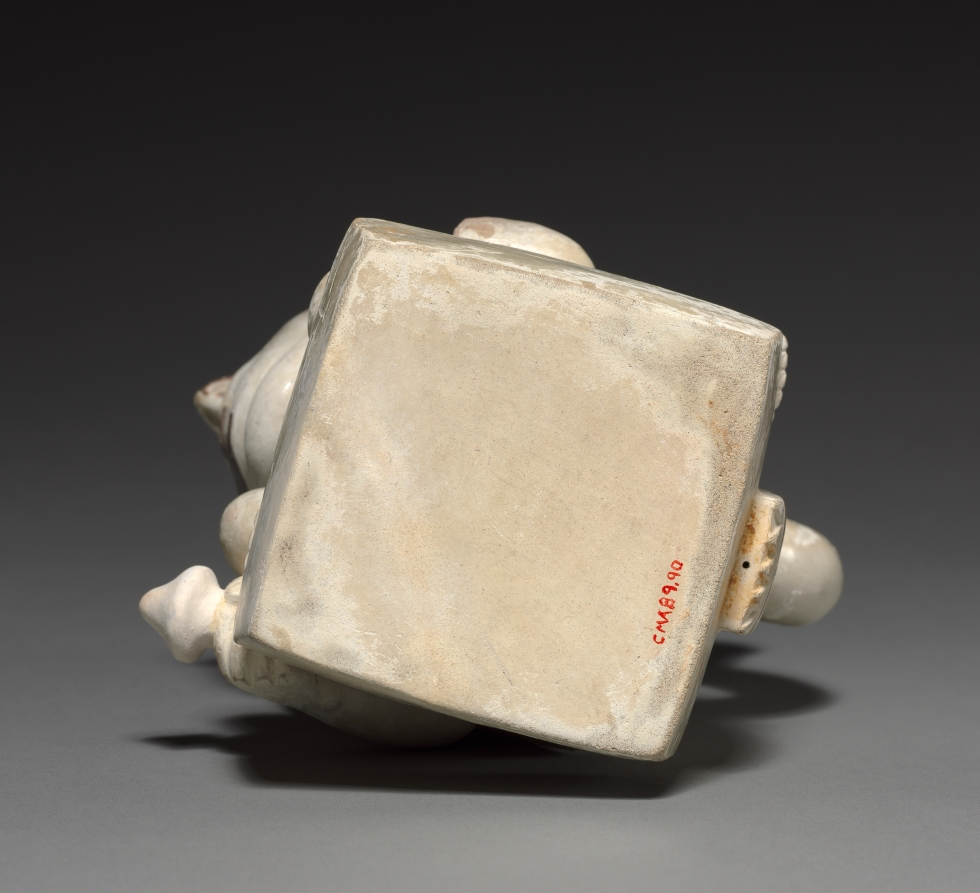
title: Warrior Vessel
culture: Peru, North Coast, Moche, Moche style (50-800)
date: c. 50–200 CE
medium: earthenware with colored slips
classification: Ceramic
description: This vessel's exquisite, crisp detail rewards careful viewing. The modeling of the feline pelt on the back is especially delicate and sharp, and each of the squares on the tunic carries a tiny dot in the upper corners, as though the squares represent plates of metal or shell attached to fabric. The face is decorated with paint or tattooing, and the headdress supports a curved, blade-shaped form.